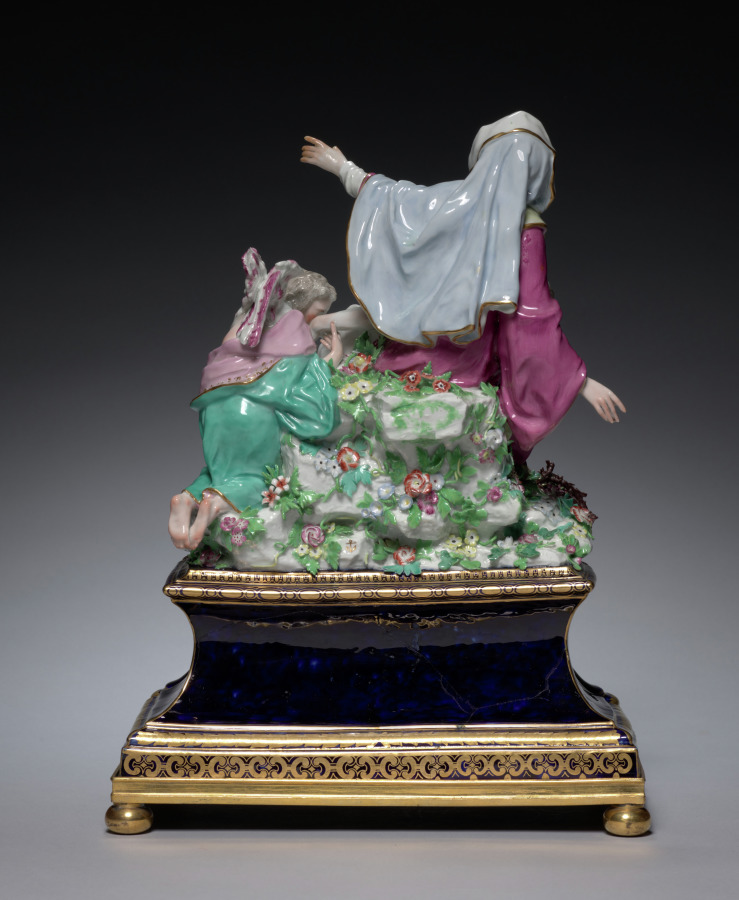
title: Figure of the Pietà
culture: England, London, Chelsea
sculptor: Joseph Willems (Flemish, 1715–1766)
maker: Chelsea Porcelain Factory (Britain, London, 1745–84)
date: c. 1761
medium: Soft-paste porcelain, painted in enamels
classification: Ceramic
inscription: Painted in gilt over the glaze at base of figure on the reverse: [a gold anchor]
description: The distinctively Roman Catholic subject of Mary cradling her son, the crucified Christ, suggests this figure was probably made for one of the aristocratic English families forced to practice their Catholicism in secret during the mid-1700s. Because of the laws banning Catholic worship in England, grand houses were often modified to include private chapels or rooms in private quarters where visiting priests delivered the sacraments in defiance of the laws favoring Protestant worship. A figure of this size and type likely would have served as an important devotional focal point within that context.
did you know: Only three examples of this figure by the Chelsea Porcelain Factory are known to exist.